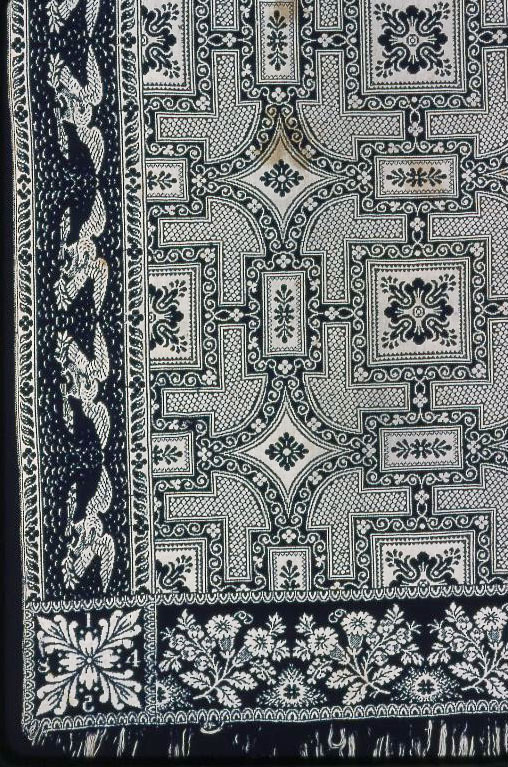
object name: Textile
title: Coverlet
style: 19th century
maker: Robert, Thomas, John or William Muir (American, born Scottish, active c. 1835-1857); United States, Indiana, Wayne County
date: 1845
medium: Cotton and wool, plain weave double cloth; woven on loom with Jacquard attachment; two loom widths joined; fringed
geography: Indiana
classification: weaving - coverlet; coverlet; weaving; textile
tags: eagles, geometric, vines, flowers, foliage, birds, bird, coverlet